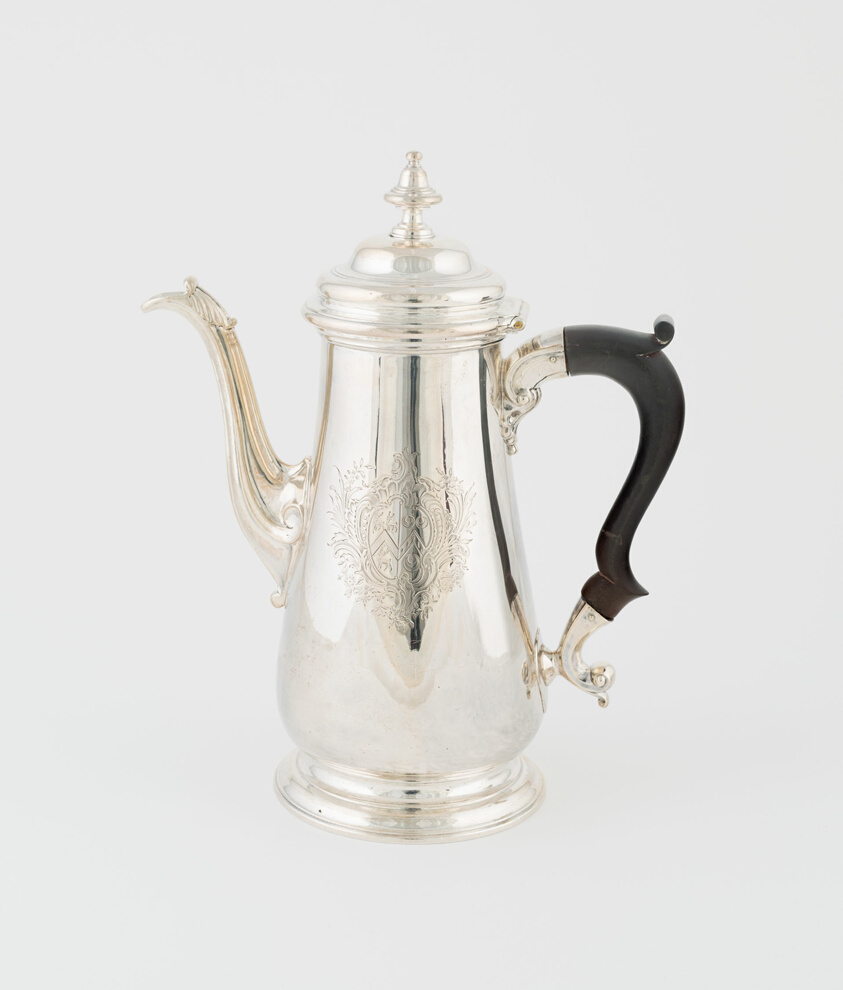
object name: Metalwork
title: Coffee Pot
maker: Fuller White; English, active 1742-73; London, England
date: 1750/51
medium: Silver and wood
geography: London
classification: silver; metalwork; european decorative arts